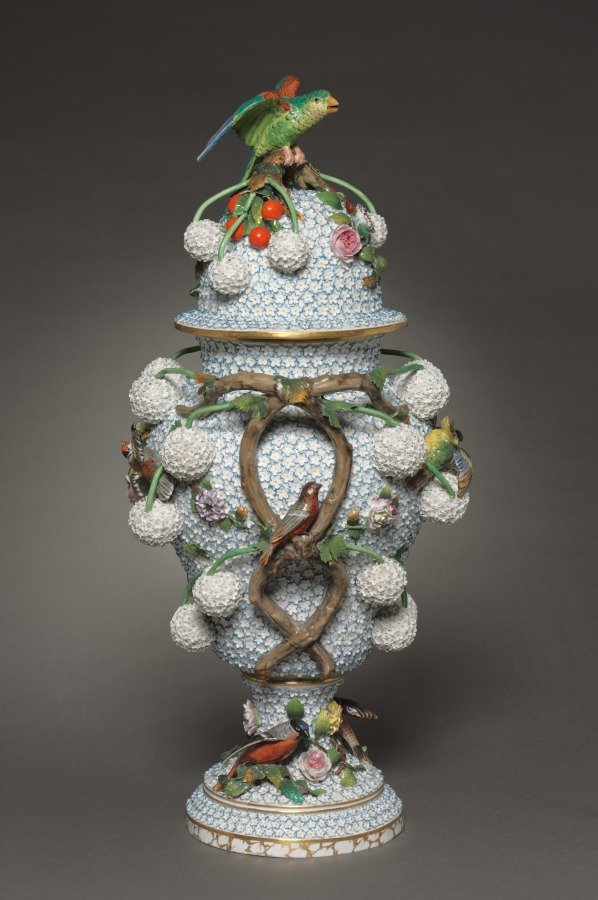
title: Vase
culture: Germany, 19th century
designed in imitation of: Meissen Porcelain Factory (German, est. c. 1710)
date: 1850–1899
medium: porcelain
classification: Ceramic